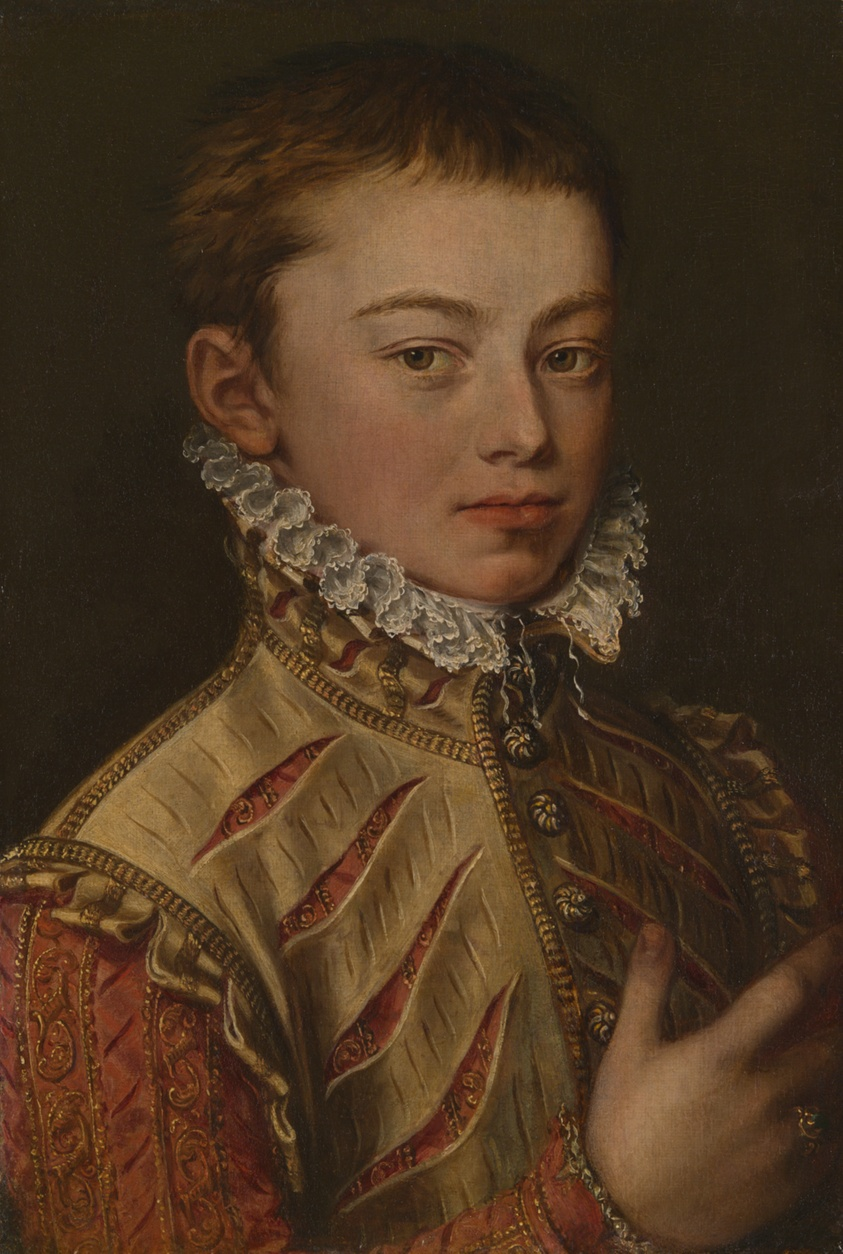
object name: Painting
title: Portrait of Don Juan of Austria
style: sixteenth century, 16th Century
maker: Alonso Sánchez Coello (Spanish, 1531/32–1588)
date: 1559/60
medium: Oil on panel, transferred to canvas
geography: Netherlands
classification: painting; spanish; portrait; oil paintings (visual works); oil on panel; paint; european painting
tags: portraits, youth, wealth, red (color), portraits: male subject, portrait, nobility, luxury, lace, gold (color)